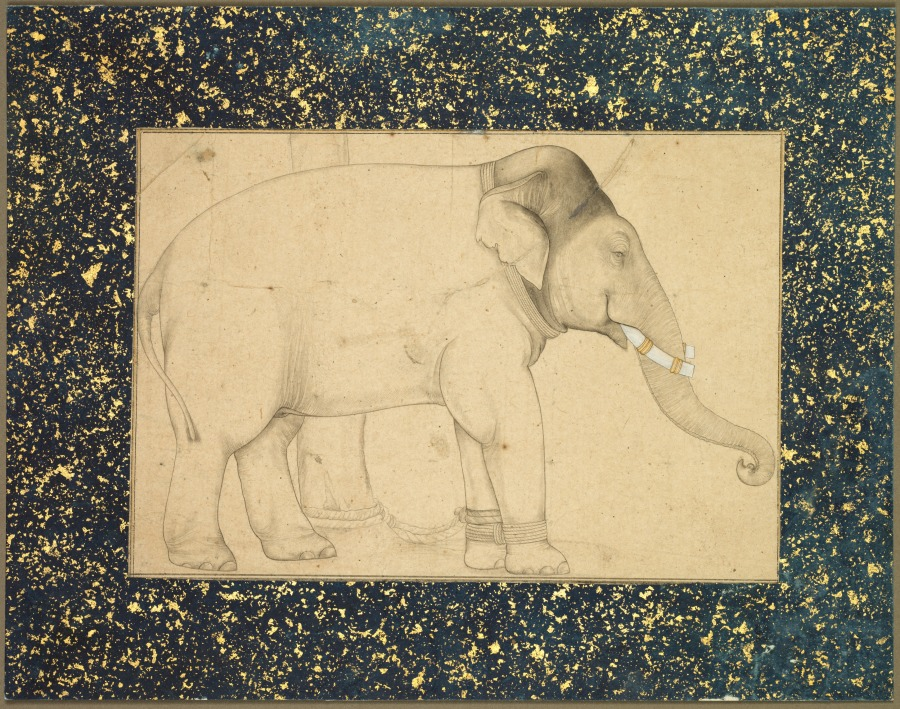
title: Drawing of an Elephant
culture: India, Mughal School, early 18th Century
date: c. 1700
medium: ink on paper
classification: Painting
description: Beginning with Babur, but especially with Akbar, the Mughal emperors displayed an enormous interest in and affection for the elephants of India. The palace housed many elephants, used by the royal court for practical tasks such as carrying heavy loads through rivers and over difficult ground, for charging into battle, and, sometimes, for executing captives. They were also used for entertainment purposes such as riding, ceremonial processions, hunting, and fighting. Royal elephants were cared for by trained staff and kept on a special diet. Their tusks, necks, and ankles were often decorated with golden chains and hoops encrusted with jewels and pearls.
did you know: Domesticated elephants had their tusks trimmed and decorated with gold rings.